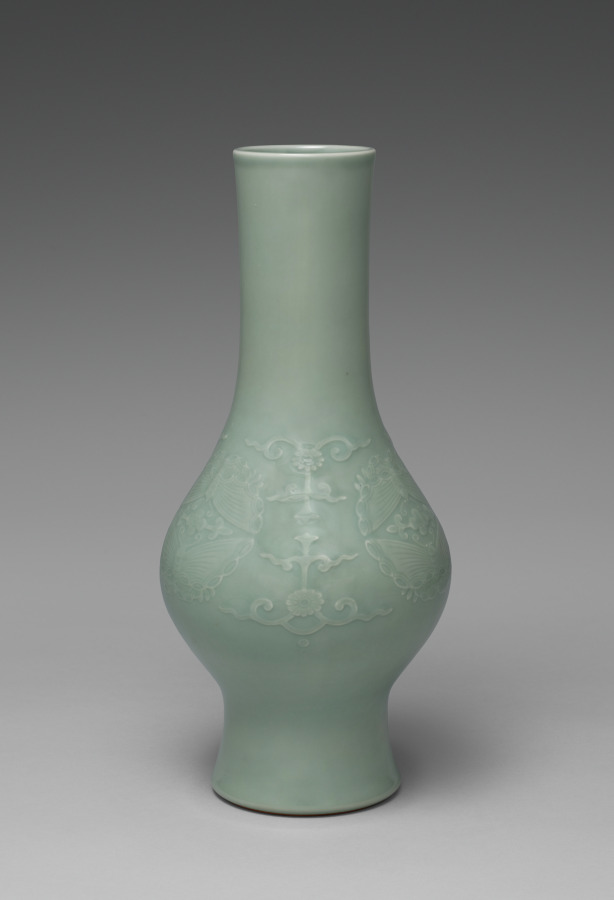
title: Flower Vase with Butterflies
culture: Japan, Meiji period (1868–1912)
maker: Seifū Yohei III (Japanese, 1851–1914)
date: 1907–14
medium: Porcelain with green glaze and carved and molded design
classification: Ceramic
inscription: 清風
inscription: 【印】 帝室技芸員。 【印】 清風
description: This flower vase has two pairs of butterflies forming low-relief roundels, one on each side. The butterflies face each other, one positioned above and the other below, their antennae curling up to a centrally placed floral motif. In the spaces between the pairs of insects, additional raised floral designs are set within vinelike extensions reminiscent of open metalwork banners and canopy adornments in Buddhist temples. The lip and the foot of the vase remain white, and the thinning of the green glaze within the higher-relief portions of the body decoration accentuates the designs. This work, like the sweets bowl CMA 2022.232, has a box lid attribution to Yohei III by Yohei IV. His inscription is dated to the autumn of 1919.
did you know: The box identifies the vase as in the hisokuyō (Chinese mise yao 秘色窯), or “mysterious color ware,” style.